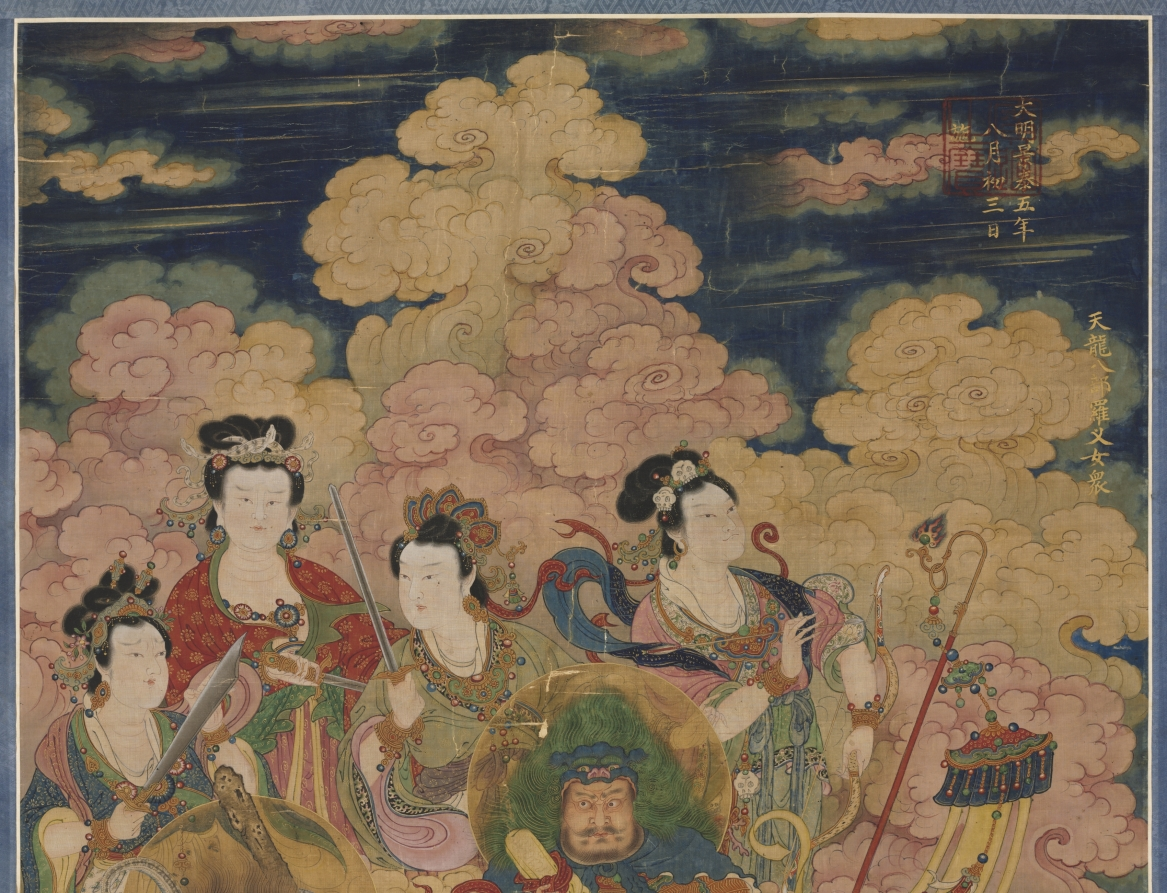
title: The Eight Hosts of Deva, Naga, and Yakshi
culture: China, Ming dynasty (1368–1644)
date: 1454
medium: hanging scroll; ink and color on silk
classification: Painting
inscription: 大明景泰五年八月初三日施 [印] 廣運之寳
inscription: 御用監太監尚義王勤等奉命提督監造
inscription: 天龍八部羅叉女衆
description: The grandest of the Buddhist mortuary rites is the Water-Land (shuilu) ritual. This esoteric ceremony is conducted for the salvation of “all souls of the dead on land and sea.” The ostentatious ritual was performed for imperial ancestors and high officials from the Song (960–1279) to the Ming dynasties and drew large crowds. On the second day of the weeklong ceremony, paintings are hung in the inner altar. This scroll represents the Eight Hosts of Celestial Nagas and Yakshis as described in the Lotus Sutra. Together with CMA 1973.70.1, it belongs to a set of 36 Water-Land ritual paintings that are the finest works of their types known from the Ming period. With their bright, opaque color and fine-line gilt decoration intact and unfaded, both paintings share a remarkable state of preservation.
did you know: The Naga is on the lower right dressed as a king with gold dragons on his blue robe.